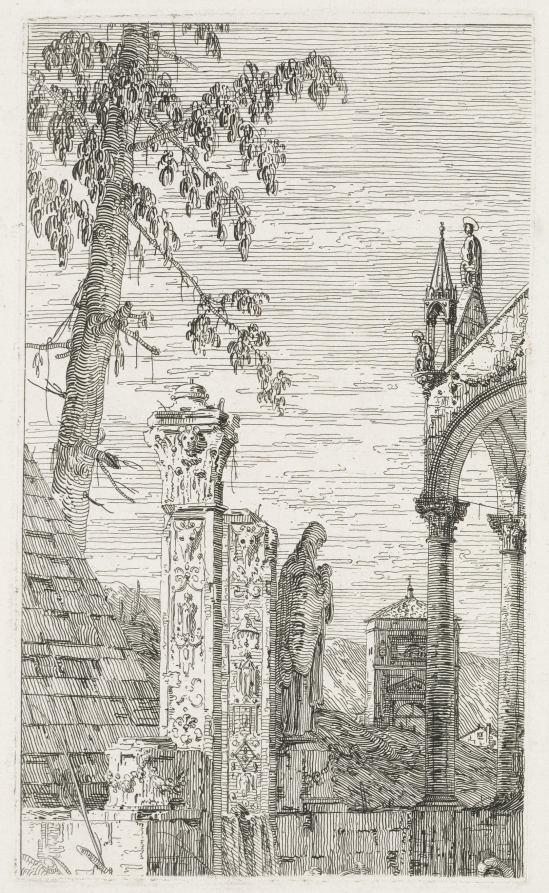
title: Views: Fragments of Sculpture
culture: Italy, Venice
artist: Antonio Canaletto (Italian, 1697–1768)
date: 1735–1746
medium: etching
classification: Print